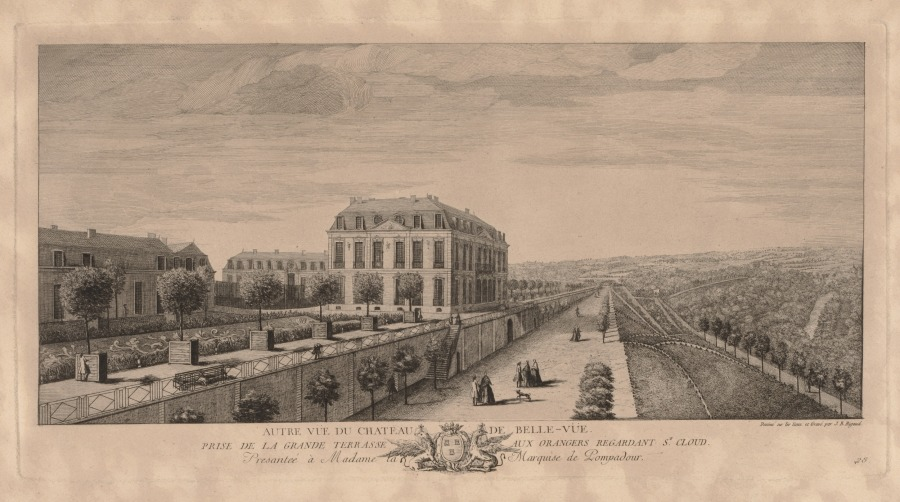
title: Chateau Bellevue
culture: France, 18th century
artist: Jacques Rigaud (French, 1681–1754)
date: c. 1720–50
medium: engraving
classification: Print